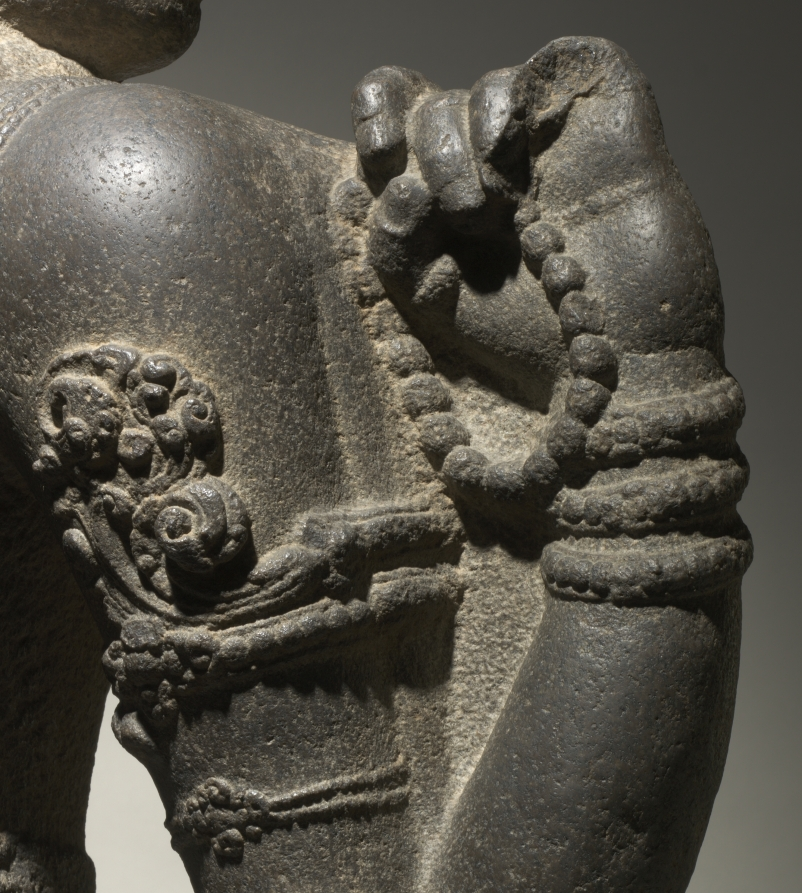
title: Brahma-Shiva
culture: South India, Tamil Nadu, Chola dynasty, late 10th - early 11th century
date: late 900s–1000s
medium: granite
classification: Sculpture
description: In the Hindu pantheon Brahma is in charge of carrying out the work of creation. In this tour-de-force of South Indian temple sculpture, he is in a special regal aspect, with the only elements of his typical priestly appearance being the prayer beads and the matted dreadlocks piled on his head. Four arms connote superhuman power, and four heads convey the idea that his creative activities spread in all four directions. His upper right hand enjoins freedom from fear, and the lower holds a lotus bud associated with birth and the process of creation. His lowered left hand is held in the gift-giving gesture, suggestive of the gift of creation he will bestow upon the world.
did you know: The back of the sculpture retains the original textured surface from a pointed chisel, suggesting it was in a niche or near a wall, protected from worshippers’ touches.